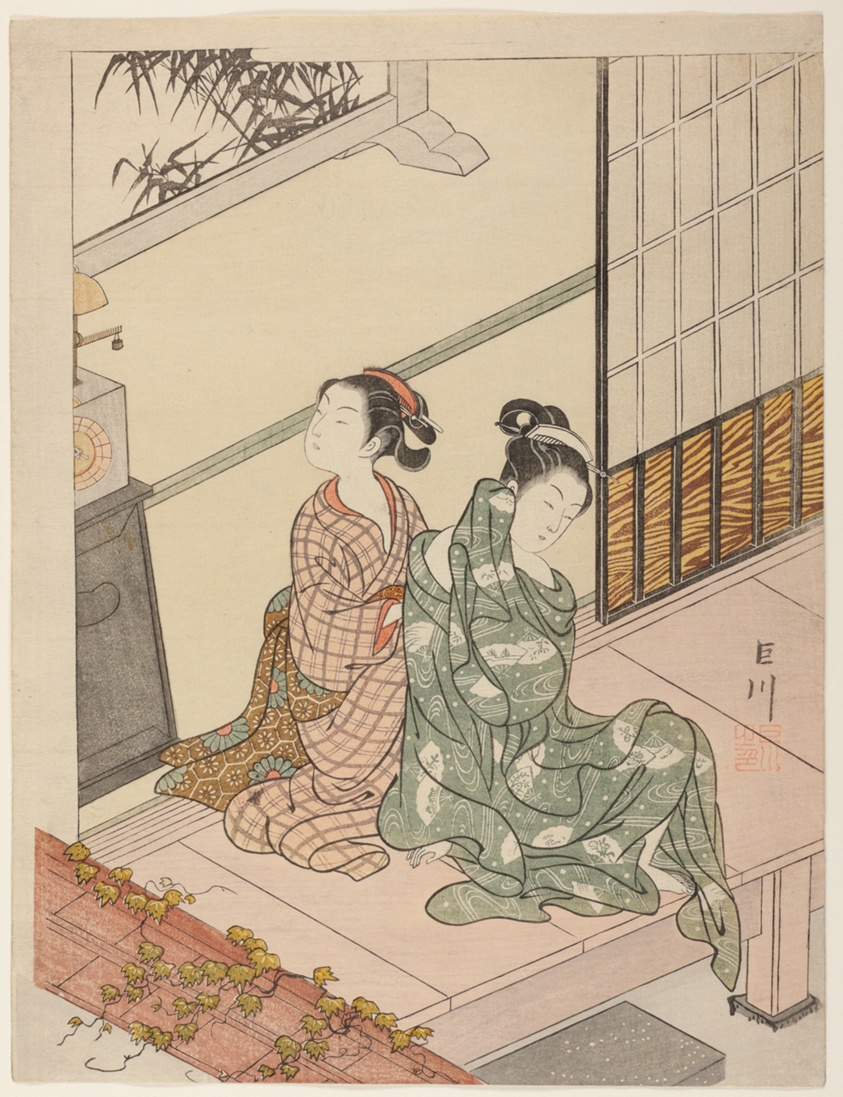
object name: Print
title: The Evening Bell of the Clock (Tokei no bansho), from the series "Eight Views of the Parlor (Zashiki hakkei)"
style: Japanese (culture or style)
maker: Suzuki Harunobu 鈴木 春信; Japanese, 1725 (?)-1770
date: c. 1766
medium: Color woodblock print; chuban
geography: Japan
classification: woodblock print; print; asian art